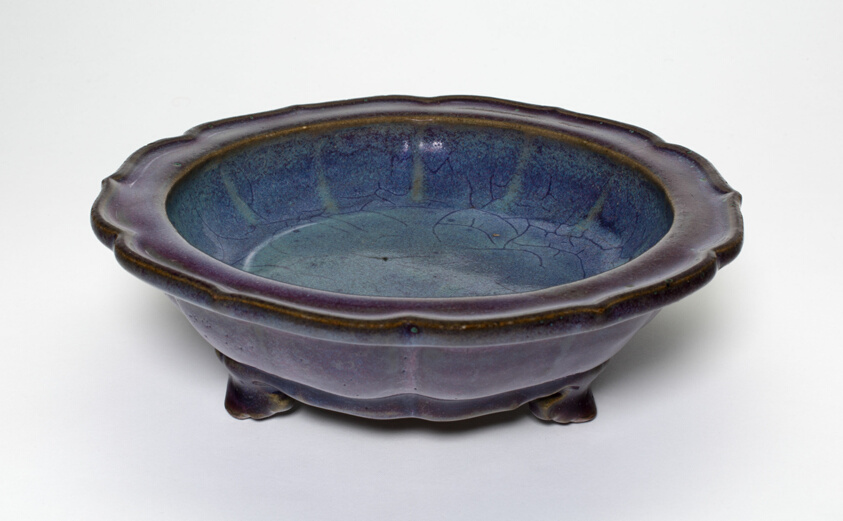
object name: Vessel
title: Foliate Dish with Three Feet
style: Chinese (culture or style)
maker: China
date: Song dynasty (960–1279)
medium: Jun ware; stoneware with purple-blue glaze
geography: China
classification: dish (vessel); stoneware; asian art; ceramics; vessel